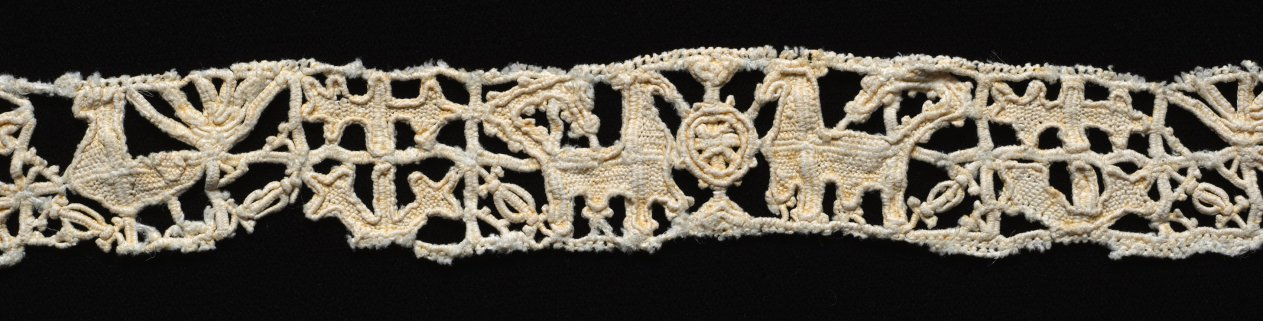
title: Lace Fragment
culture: Italy, 1600-1640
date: 1600–1640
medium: Linen: needle lace (reticella)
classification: Lace